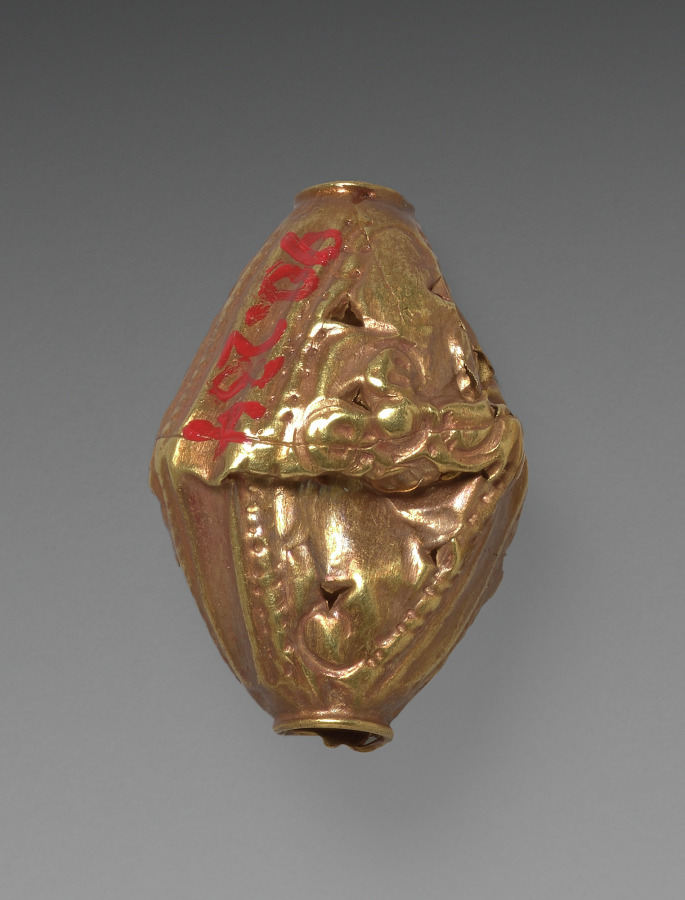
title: Bead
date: after 1519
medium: gold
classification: Jewelry